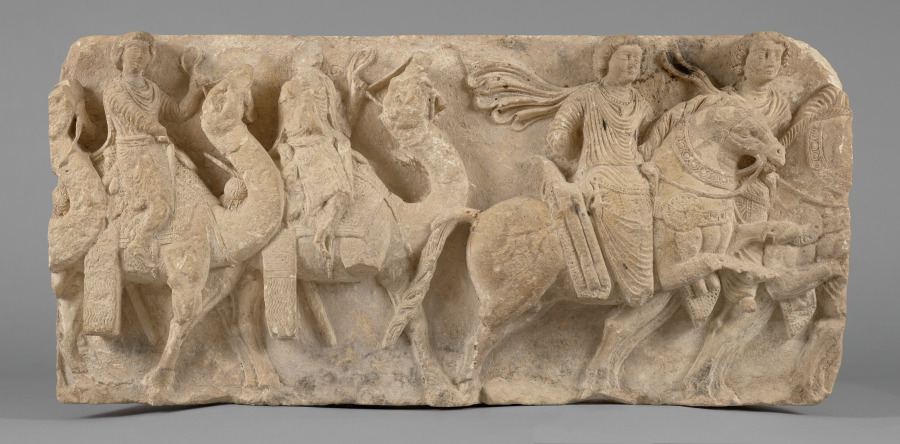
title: Procession of Nobles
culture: Syria, Palmyra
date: 100–150 CE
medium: limestone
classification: Sculpture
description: Palmyra was a key center for trade between the Roman and Parthian Empires. This unique relief has been associated with Palmyra only through stylistic comparisons; it is not known where it was found on the site. It depicts men in Parthian dress riding Arabian horses with bejeweled harness trappings ahead of riders on camels—a possible reference to the caravans that made Palmyra so wealthy. Although all of the riders are dressed and equipped as Parthians, the proportions and perspective of the scene seem to be informed by Greco-Roman conventions. It may depict a ceremonial procession.